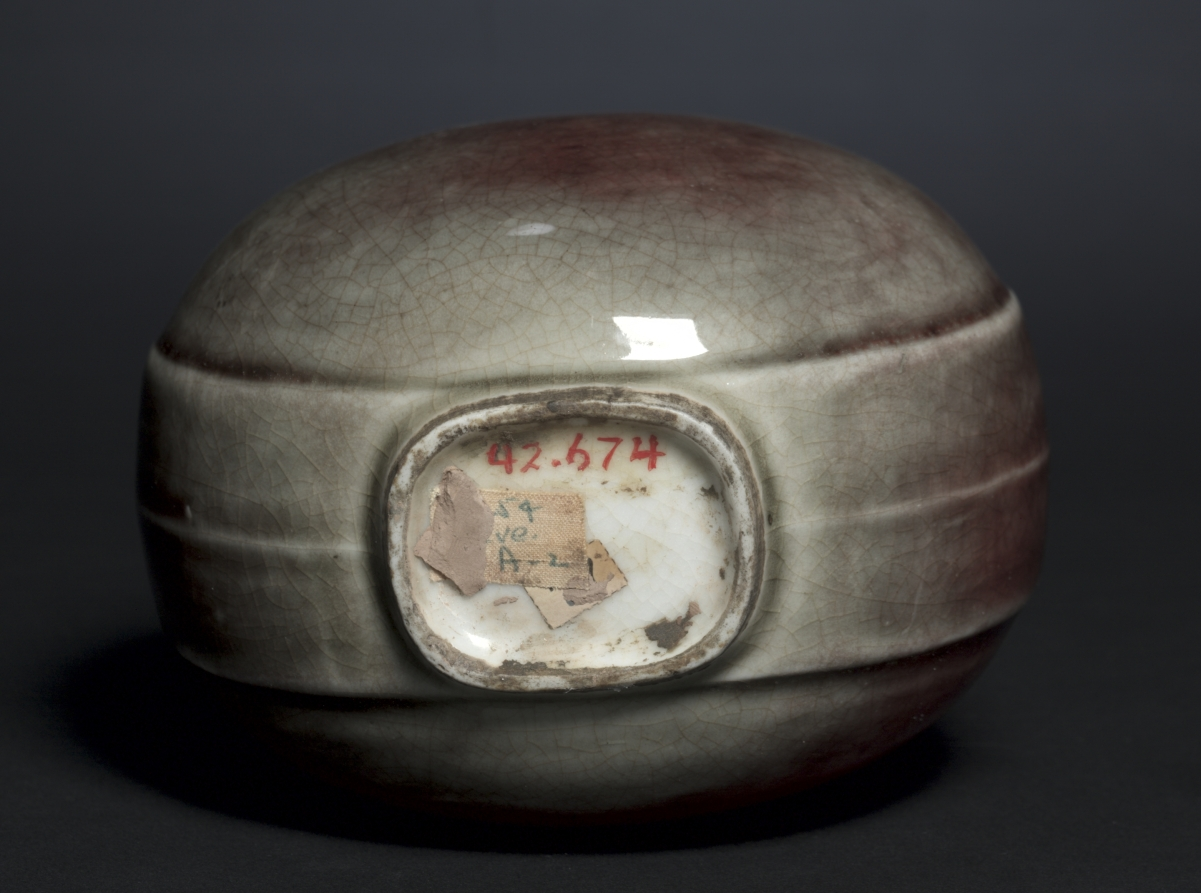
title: Gourd Flask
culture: China, Jingdezhen, Jiangxi province, Qing dynasty (1644–1911), Kangxi reign (1662–1722)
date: 1662–1722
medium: porcelain, Lang ware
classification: Ceramic